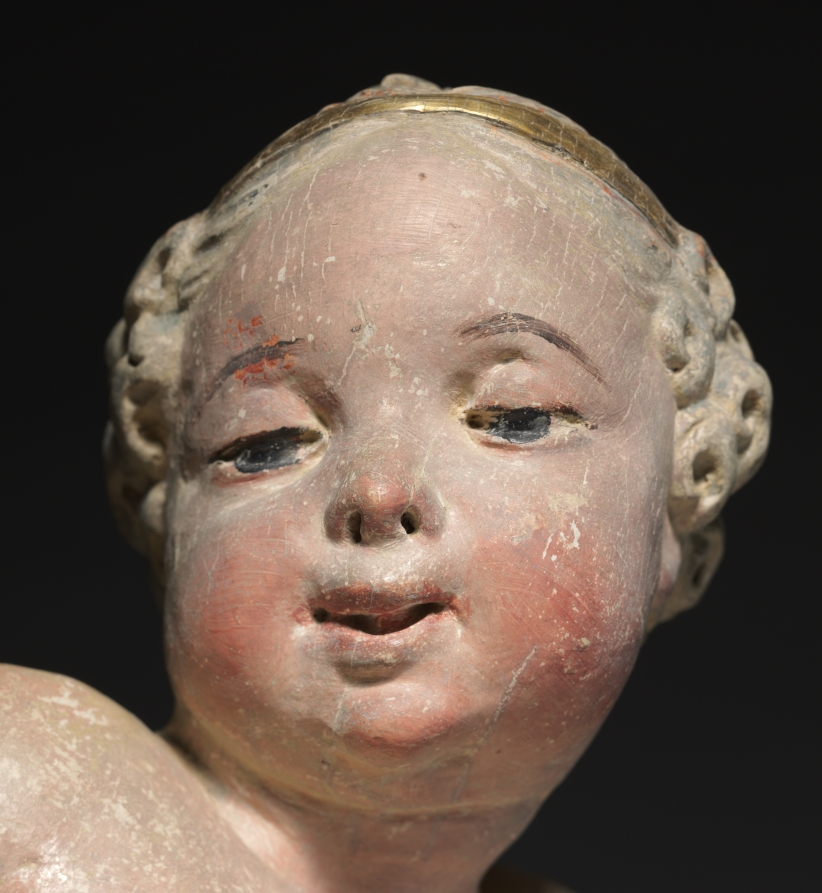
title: Putto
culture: Germany, near Bamberg, 18th century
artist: Ferdinand Tietz (Austrian, 1708–1777)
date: mid-1700s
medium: painted and gilded wood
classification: Sculpture